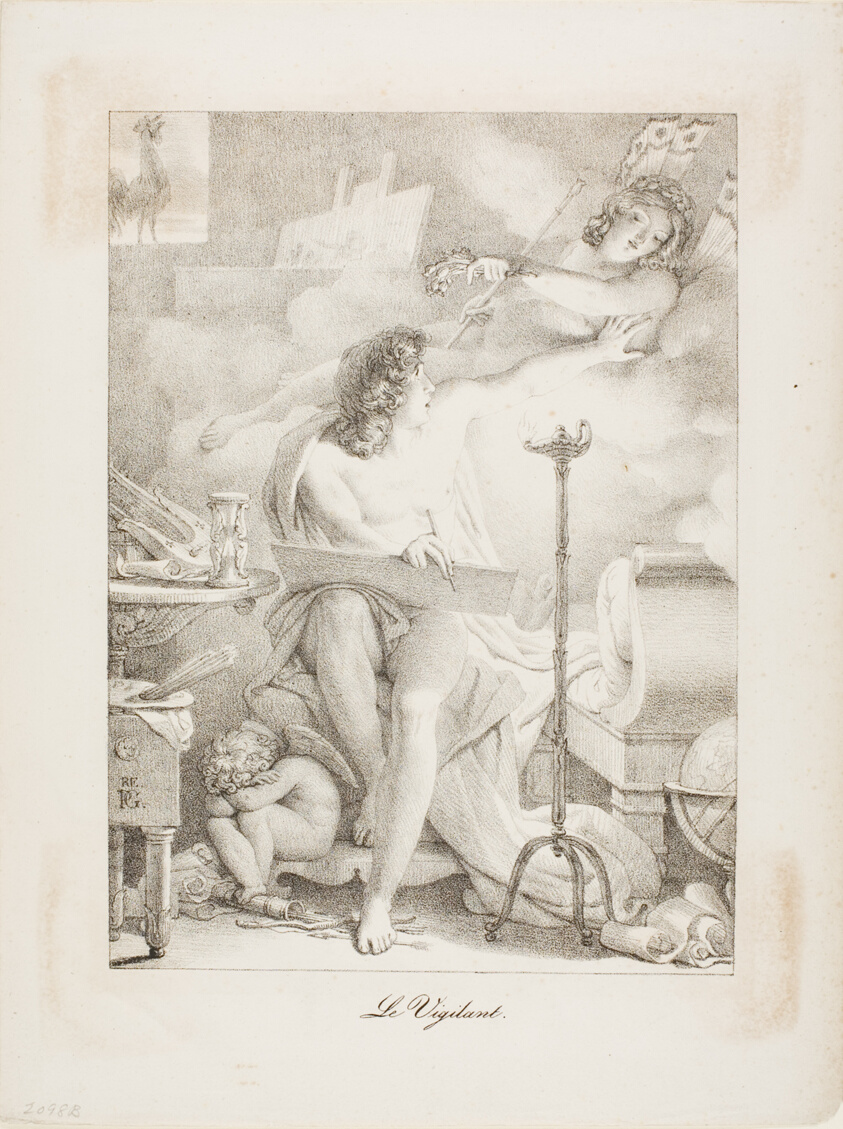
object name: Print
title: The Vigilant One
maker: Pierre Guérin (French, 1774-1833)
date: 1816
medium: Lithograph in black on cream wove paper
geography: France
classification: lithograph; print; prints and drawing